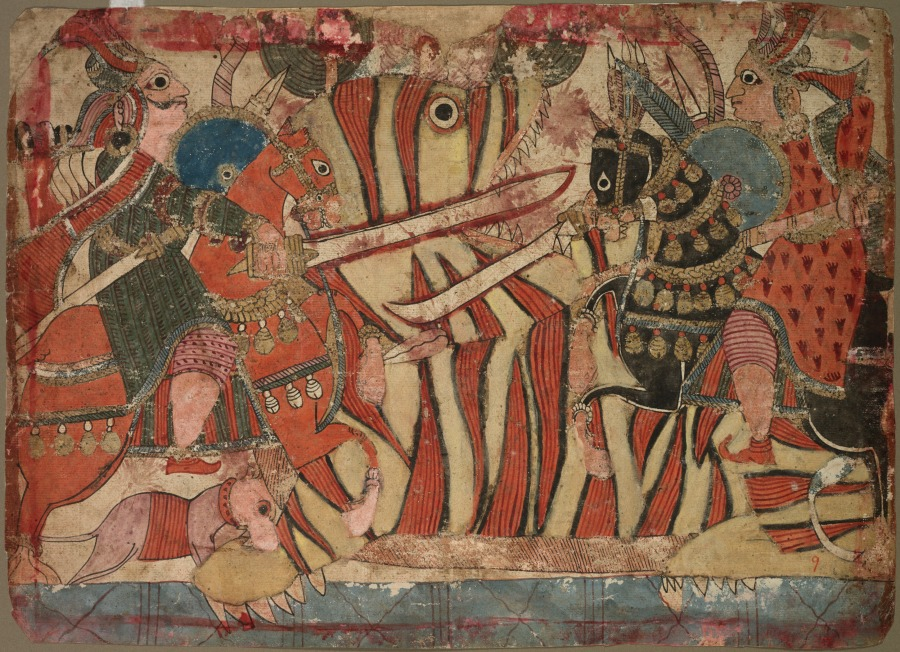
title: Illustration of the Mahabharata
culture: India, Maharashtra, Paithan School, early 19th Century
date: c. 1800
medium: color on paper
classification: Painting